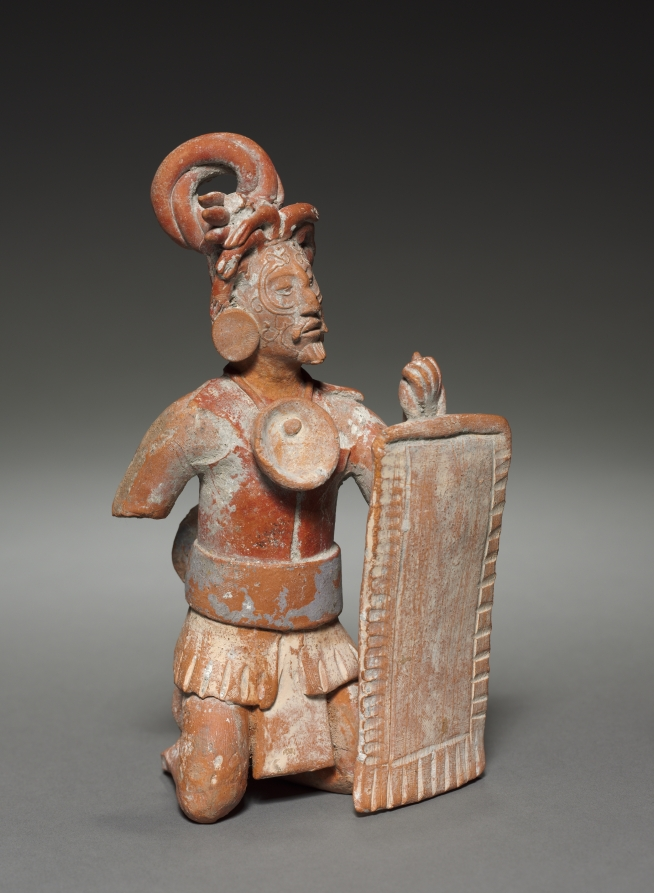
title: Warrior Figurine with Shield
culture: Mexico, Classic Maya, Jaina style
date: 600–900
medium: molded and modeled pottery with traces of pigment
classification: Sculpture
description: Maya figurines portray a wide range of human, animals, and supernatural beings. This example represents a kneeling warrior who holds a rectangular shield and wears elaborate ornaments, including huge ear spools. The expressive, delicate head was made in a mold; the body was hand modeled.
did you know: Elaborate facial tattoos and a bivalve pendent identify this warrior as a sajal, a second-tier noble.